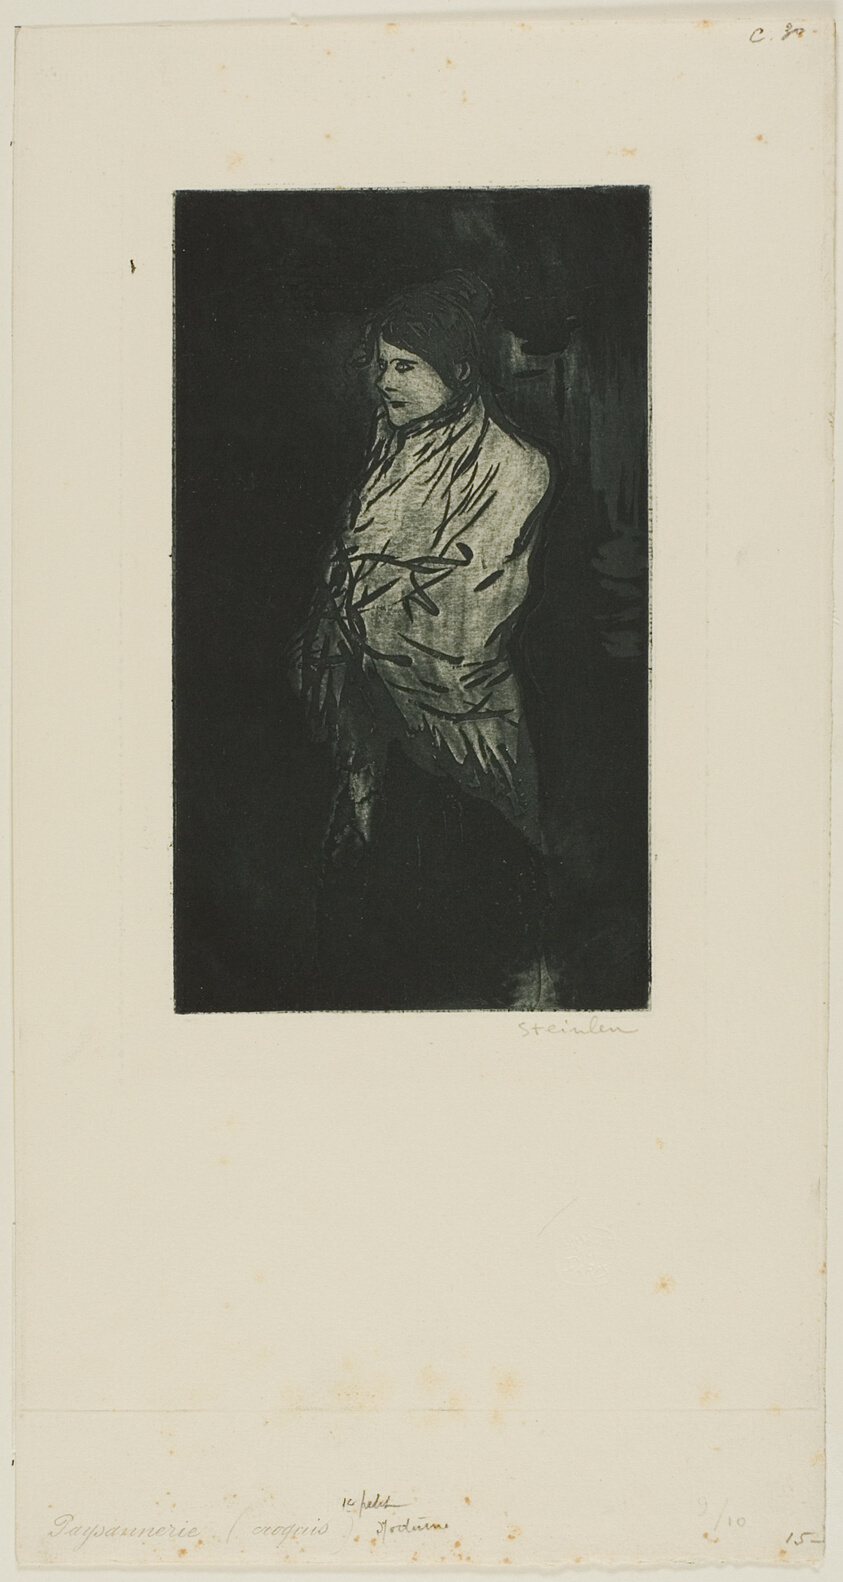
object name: Print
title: First Little Night Piece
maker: Théophile-Alexandre Steinlen; French, born Switzerland, 1859-1923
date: 1898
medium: Aquatint from a zinc plate in black on ivory wove paper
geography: France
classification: aquatint; print; prints and drawing